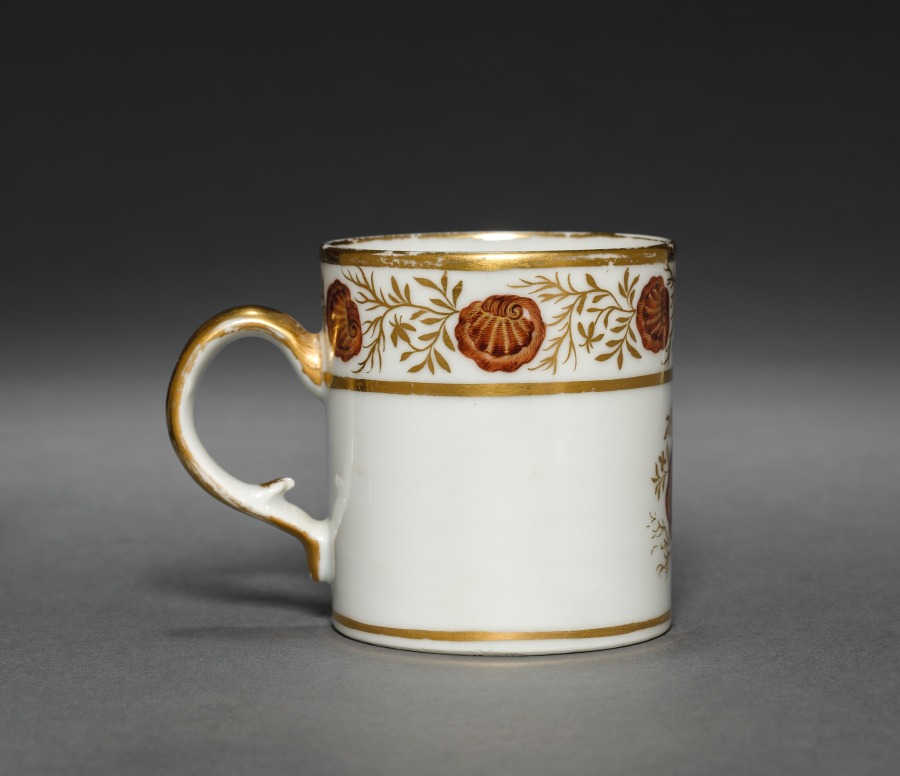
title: Cup from Oliver Wolcott, Jr. Tea Service (2 of 6)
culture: Chinese Export porcelain, late 18th-early 19th century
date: 1785–1805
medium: porcelain, sepia enamel, gold leaf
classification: Ceramic